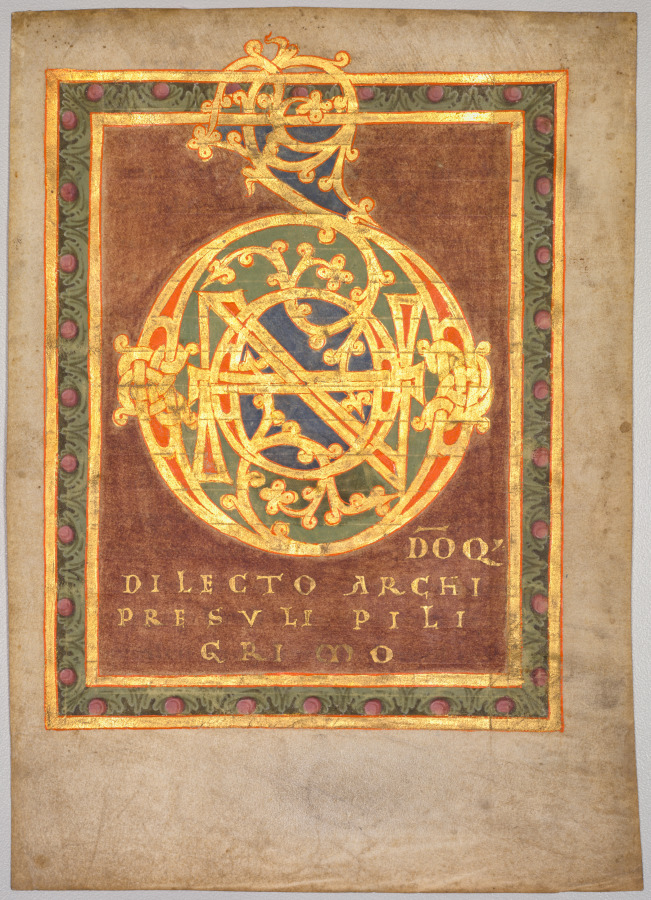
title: Title Page of Abbot Berno's "Tonarius:" Initial D[omino]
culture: Germany, Abbey of Reichenau, 11th century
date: c.1030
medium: ink, tempera, and gold on vellum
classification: Manuscript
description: This leaf originally served as the dedication page of the Tonarius, or Tonary, written by Reichenau's Abbot Berno (1008-1048). A tonary was a music manual used to regulate liturgical chants. Berno's manuscript was presented to Archbishop Pilgrim of Cologne (1021-1036) whose name appears at the bottom of this leaf.